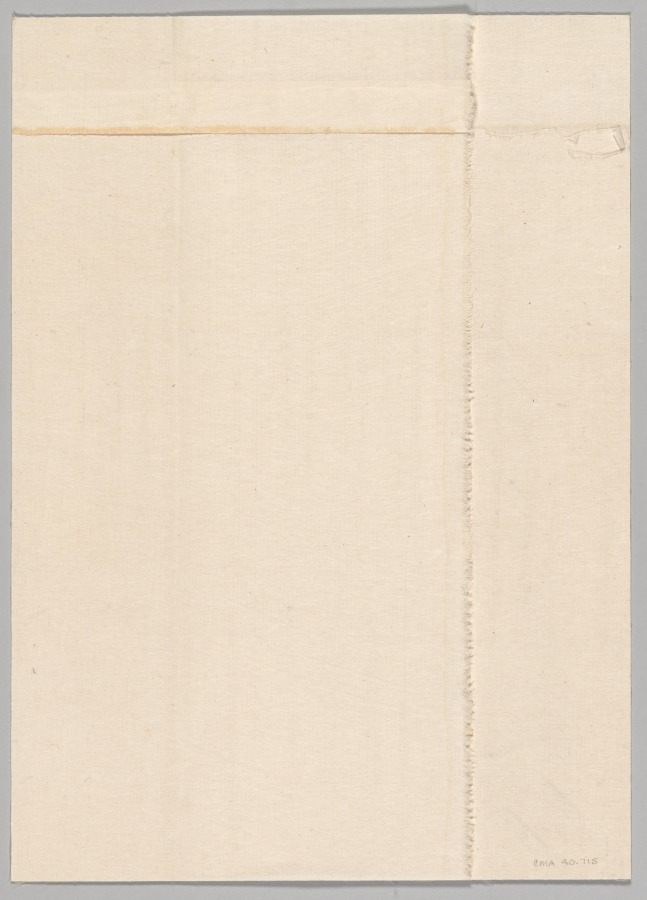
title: Woman with a Fan in her Left Hand Combing her Hair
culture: Japan, Edo period (1615–1868)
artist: Utagawa Kunisada (Japanese, 1786–1865)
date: 1786–1864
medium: color woodblock print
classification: Print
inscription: Signature: Ichiyosai Toyokuni